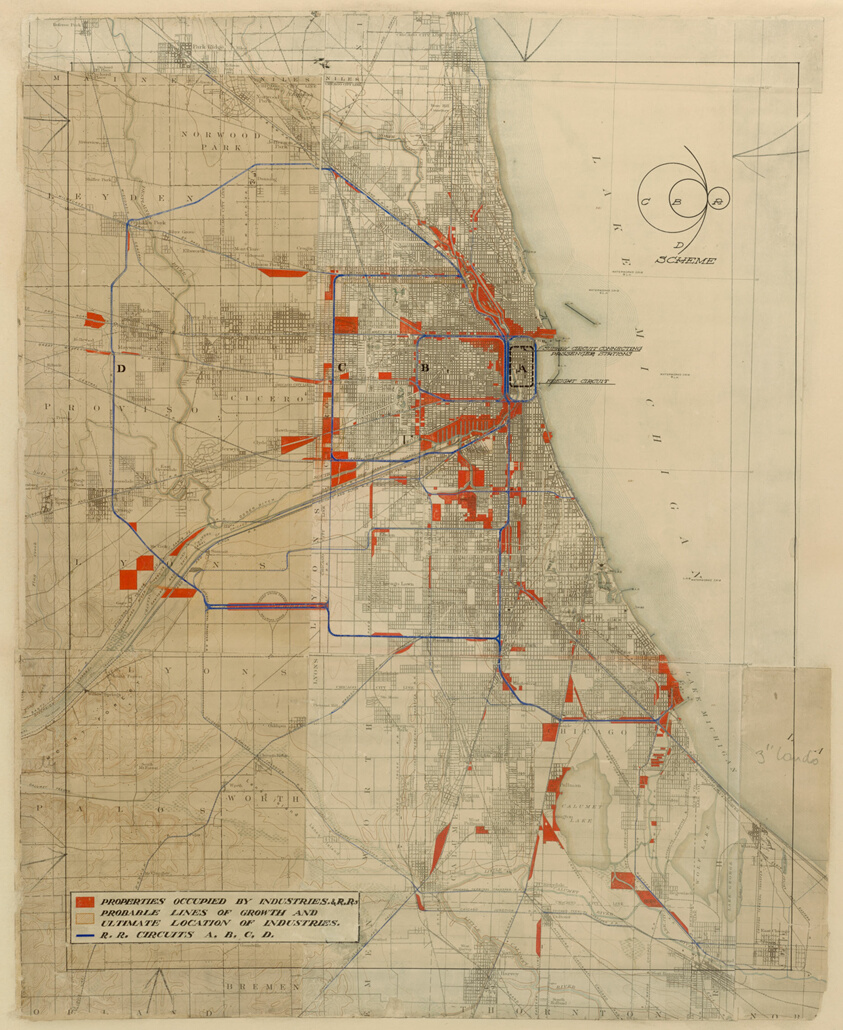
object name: Architectural Drawing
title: Plan of Chicago, Chicago, Illinois, Railroad Circuits Diagram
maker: Daniel Hudson Burnham (American, 1846-1912); Edward Herbert Bennett (American, born England, 1874-1954)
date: 1909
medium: Colored ink and paint on a printed map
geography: Chicago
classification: design drawing; architectural drawing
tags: Chicago, architecture